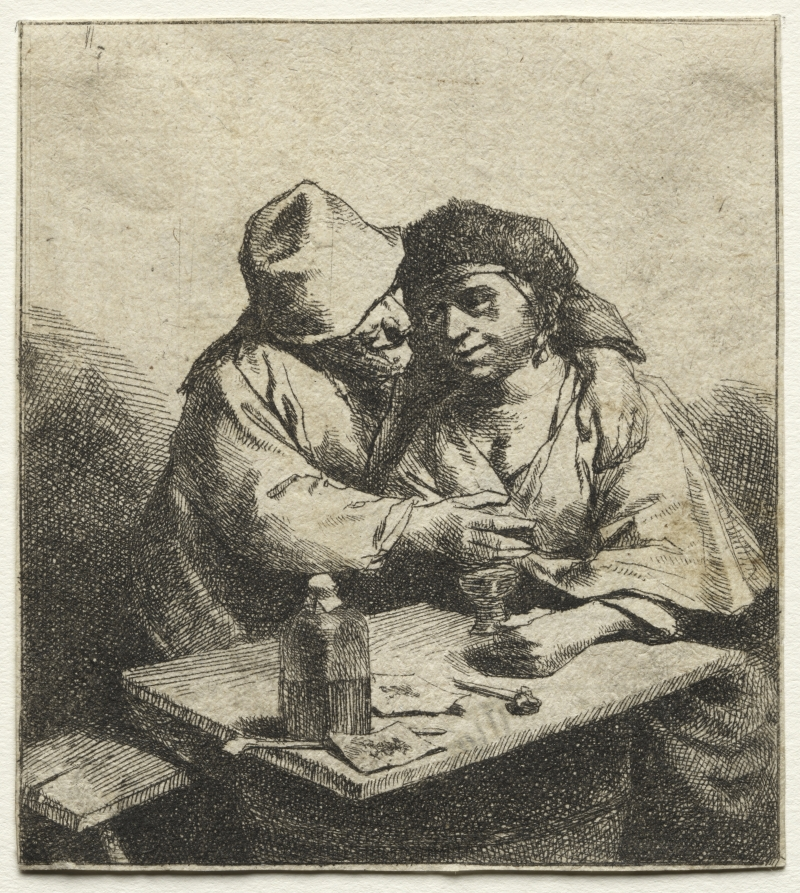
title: The Amorous Couple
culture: Netherlands, mid 17th century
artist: Cornelis Pietersz Bega (Dutch, 1631/32–1664)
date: 1642–64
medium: etching with engraving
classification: Print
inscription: VERSO, top center, in graphite: [Darthoh?] N° 2[5?] ; lower right quadrant, in graphite: Bega / Les Deux Amourex[upsidedown] ; lower left, in graphite: a53000 ; lower left, in graphite: a47128[crossed out] ; lower center, in graphite: 25. ; lower right, in graphite: [OUO?]/1540